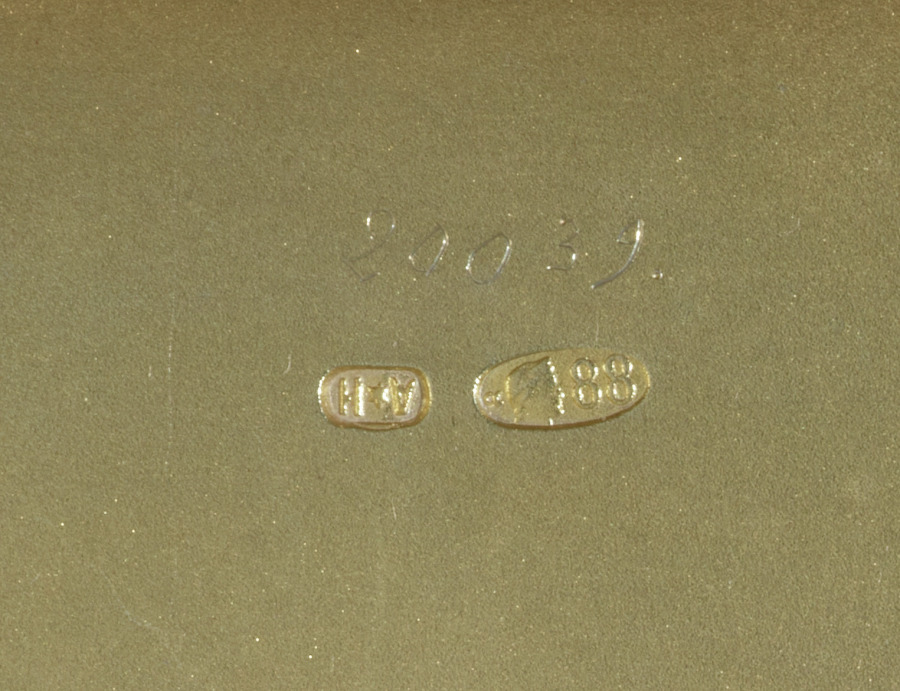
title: Cigarette Case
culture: Russian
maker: House of Fabergé (Russian, 1842–1918)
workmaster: August Hollming (Finnish, 1854–1913)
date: 1911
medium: Silver, ruby, textile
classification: Silver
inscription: Signed with initials of the workmaster August Hollming (active 1880-1913)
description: Fabergé offered variations of a cigarette case model such as this example, using different materials, surface treatments, and ornamentation. Accommodating individual clients’ wishes, the firm would also add a family insignia or additional decoration. The finely ridged surface demonstrates the superb handling of the precious metal by August Hollming, a Finnish master who worked for Fabergé in Saint Petersburg.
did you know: The cigarette case also includes a compartment for a match striker.